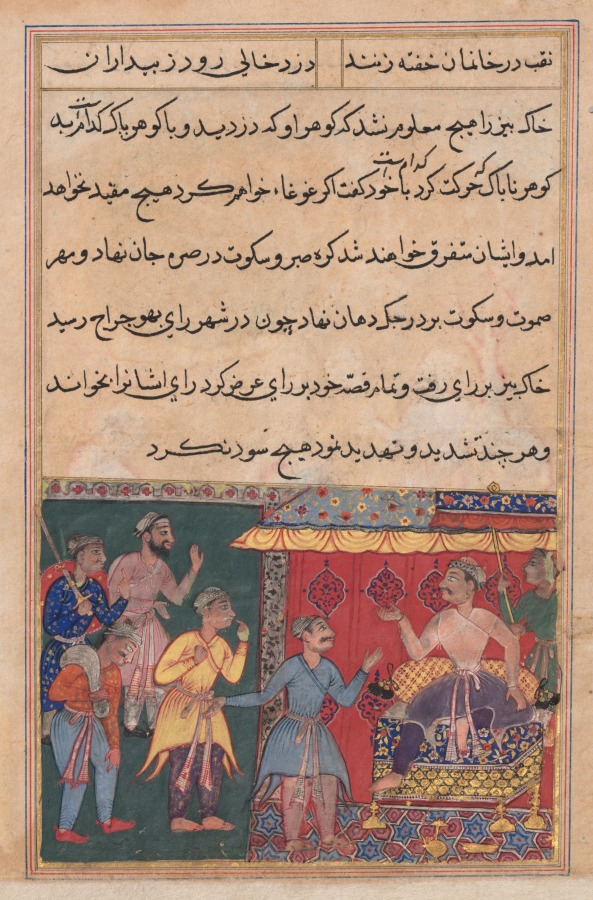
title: King Bhojaraja tries in vain to ascertain the whereabouts of the pearl from the four travelling companions, from a Tuti-nama (Tales of a Parrot): Twelfth Night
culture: Mughal India, court of Akbar (reigned 1556–1605)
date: c. 1560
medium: gum tempera, ink, and gold on paper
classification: Painting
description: Having arrived at the king's court, the streetcleaner laments that his priceless pearl was stolen, but he knows not by whom. The king summons the four travelers, but in spite of severe threats, none admits to the crime. The king sits on a golden seat with tent-like trappings behind him while an attendant holds the parasol of royalty over his head. Unable to discern who stole the pearl, the king calls for his clever daughter "who was so intelligent and resourceful in solving problems that she had instilled humility even in cunning and sagacious men." She related a story. From each of their reactions to the story, she was able to identify the thief, and the pearl was recovered.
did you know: The king’s trellised kulahdar turban is a vestige of pre-Akbar painting styles.